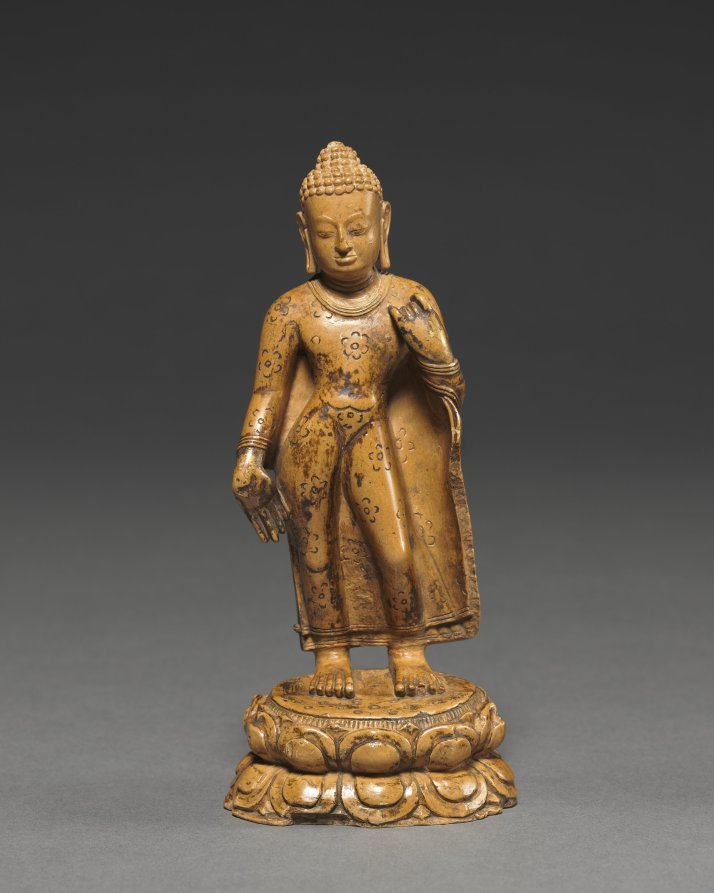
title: Standing Buddha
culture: Burma (Myanmar)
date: c. 800s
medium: Kaolin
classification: Sculpture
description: This small sculpture was probably part of a set of eight main scenes from the life of the Buddha, each identified by a specific hand gesture. When the standing Buddha gestures down with his right hand, with the palm facing out, he usually signals his miraculous descent from the Heaven of the Thirty-three Gods, where he once spent a monsoon season giving teachings to his mother. She died shortly after his birth and was reborn in the heaven.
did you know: The robe is covered with flowers on the front and back, possibly alluding to the flowers falling from heaven as the Buddha descended back to earth.